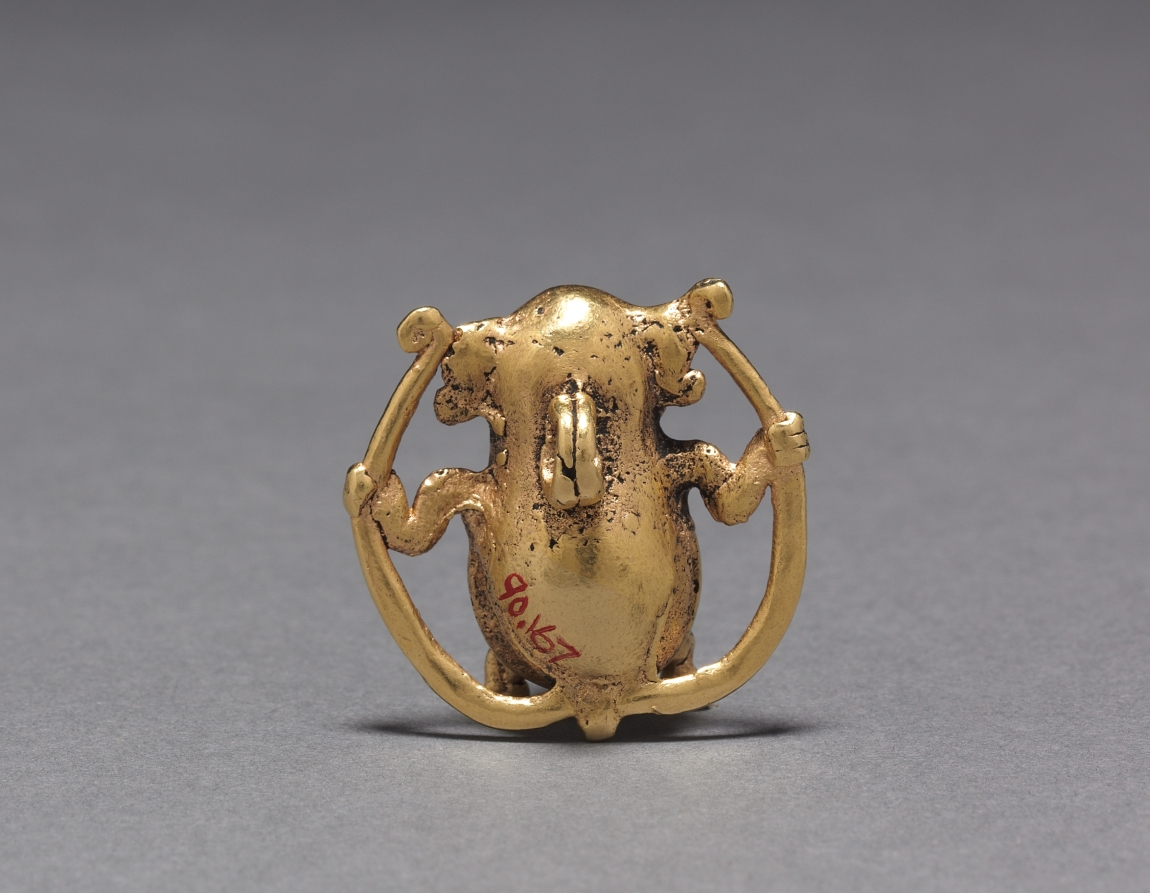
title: Monkey Bell Pendant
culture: Western Panama, Veraguas-Gran Chiriquí Style, c. 700-1550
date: c. 700–1550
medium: cast gold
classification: Metalwork